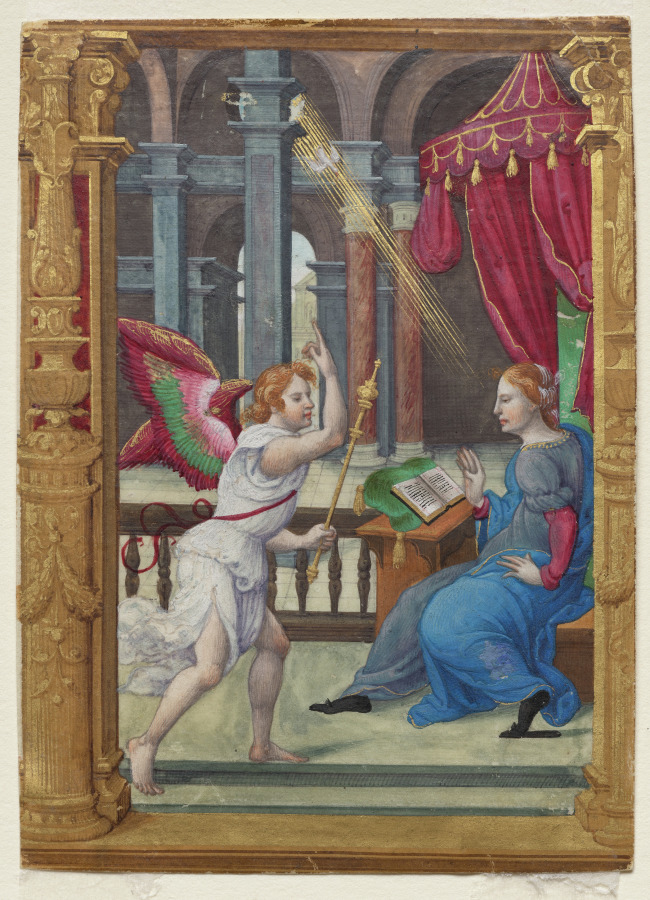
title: The Annunciation (Matins, Office of the Virgin): Leaf from a Book of Hours (1 of 3 Excised Leaves)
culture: France, Paris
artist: Noël Bellemare (French, d. 1546)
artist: and The 1520s Hours Workshop (French)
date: c. 1530–35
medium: ink, tempera, and liquid gold on vellum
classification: Manuscript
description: Unusual in French manuscript painting of the period, fuchsia pinks and bright acid greens characterize the painting’s palette. The figures are set in the foreground of the miniature and enclosed within a "Fontainebleau"-style architectural frame. The 1520s Hours Workshop primarily produced jewel-like luxury books of hours for a wealthy clientele. Evidence points to Paris as the site of the workshop's activity under the direction of the Antwerp-born miniaturist Noël Bellemare (died 1546).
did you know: Books of hours were often purchased as luxury objects in order to reflect the owner’s status, wealth, and taste.